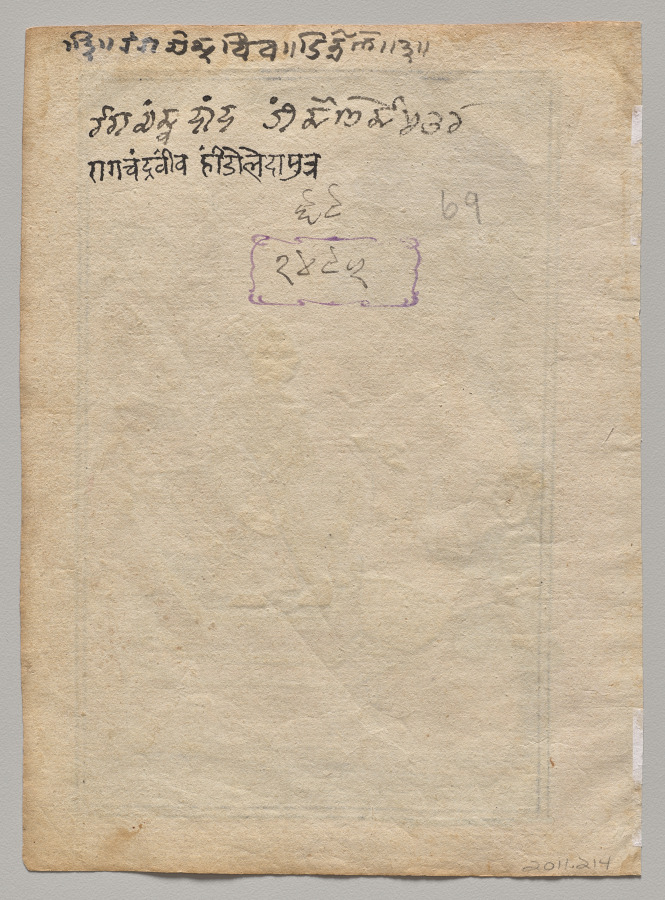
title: Vivaca Ragaputra, a Leaf from Ragamala Series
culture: India, Pahari Hills, Bilaspur school, 18th century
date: c. 1700–1720s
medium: Gum tempera and gold on paper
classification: Painting